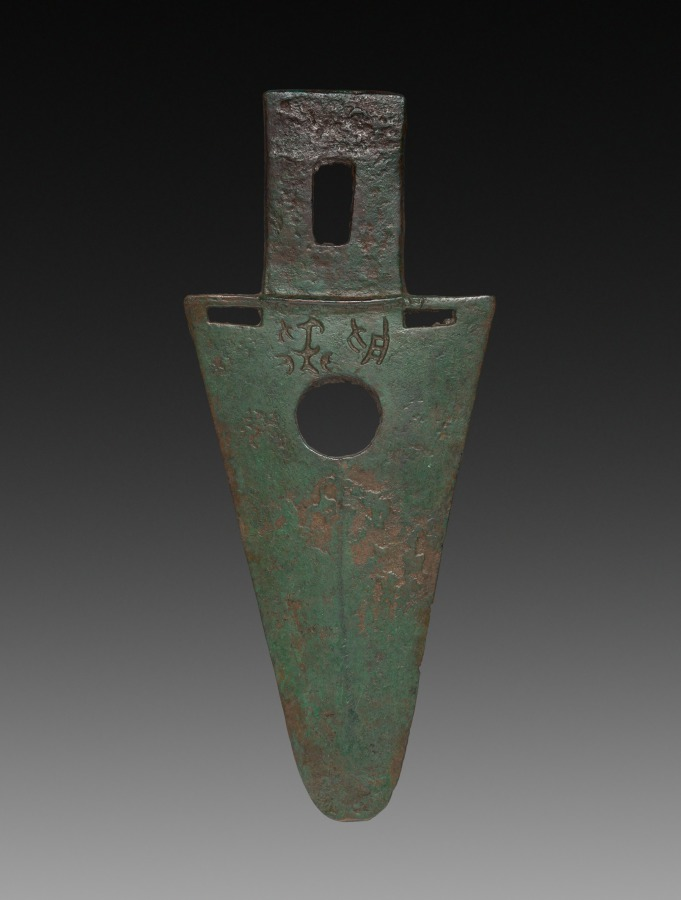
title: Spearhead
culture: China, Zhou dynasty (c. 1046–256 BCE)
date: 1045–256 BCE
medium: bronze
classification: Arms and Armor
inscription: Two ancient characters incised on the blade.